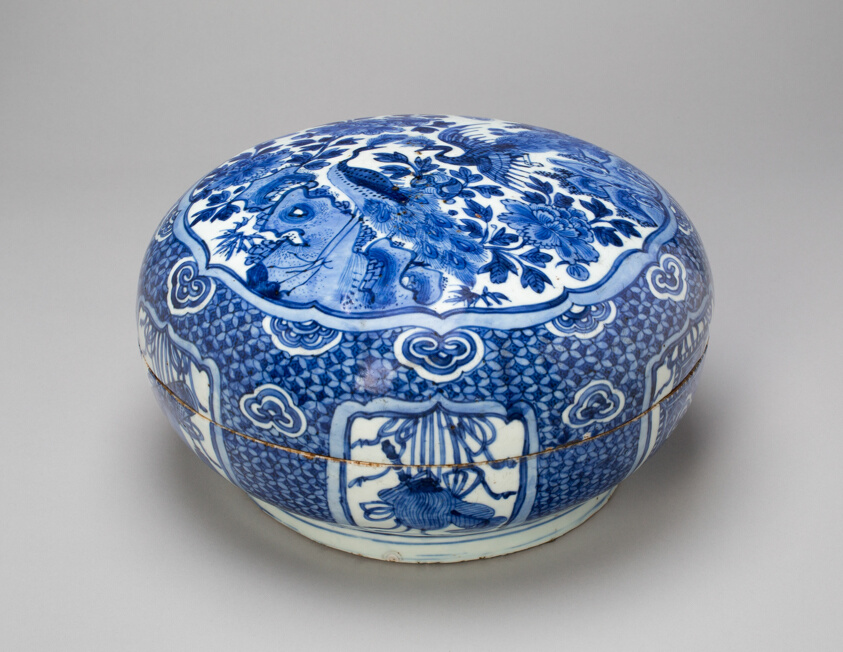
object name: Vessel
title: Circular Box with Peacocks, Peonies, and Auspicious Motifs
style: Chinese (culture or style)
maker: China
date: Ming dynasty (1368–1644), Wanli period (1573–1620)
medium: Porcelain painted in underglaze blue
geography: China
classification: porcelain; asian art; ceramics; vessel